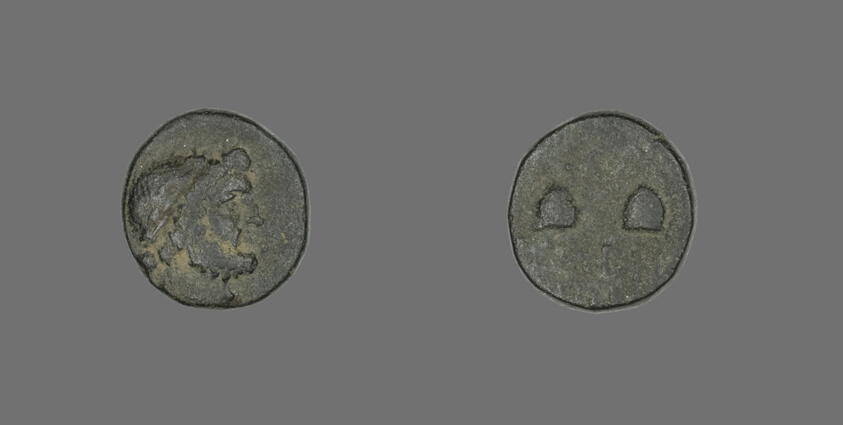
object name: Coin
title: Coin Depicting the God Zeus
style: greek, ancient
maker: Greek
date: about 1st century BCE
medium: Bronze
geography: Ancient Greece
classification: coin; ancient art